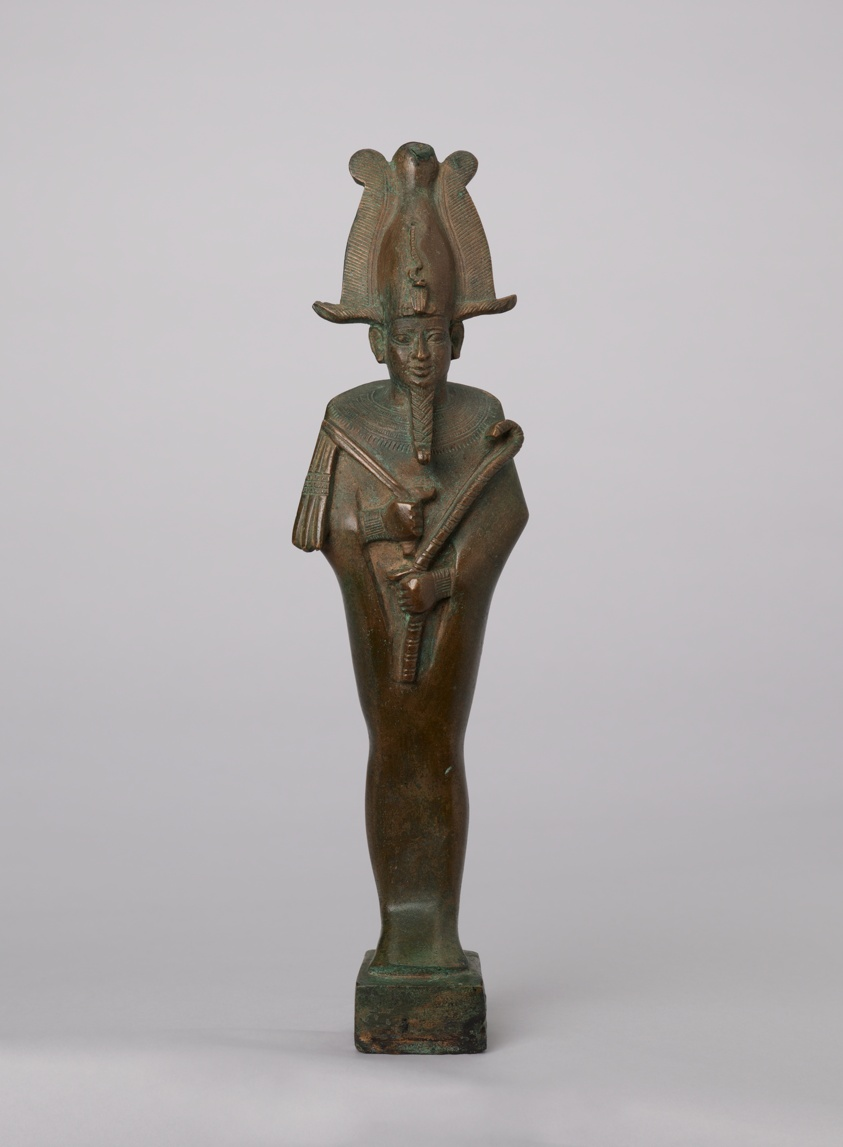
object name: Sculpture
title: Statuette of Osiris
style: late period (egyptian), ancient, egyptian, twenty-sixth dynasty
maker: Egyptian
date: Late Period, Dynasty 26 or later, 664–332 BCE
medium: Copper alloy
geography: Egypt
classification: statuette; bronze; metal; sculpture; ancient art; votive offering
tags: gods (deities), mythology, mummies, crowns, king